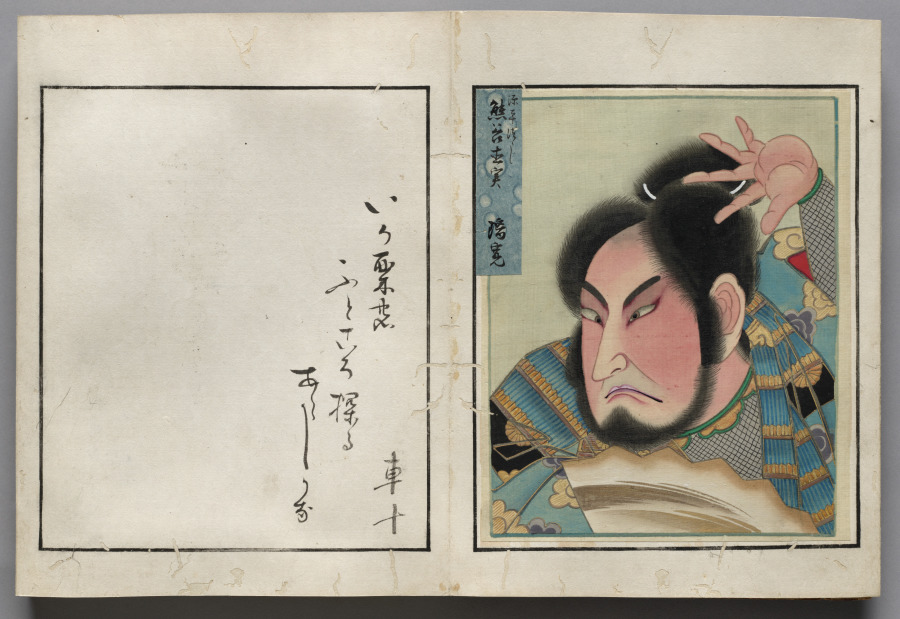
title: Double-Leaf from Album of Actor Portraits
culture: Japan, Edo period (1615–1868)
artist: Shōrakusai (Japanese)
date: c. 1790–1810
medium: double-leaf from an accordion-style album; ink and color on silk (right) and ink on paper (left)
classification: Bound Volume